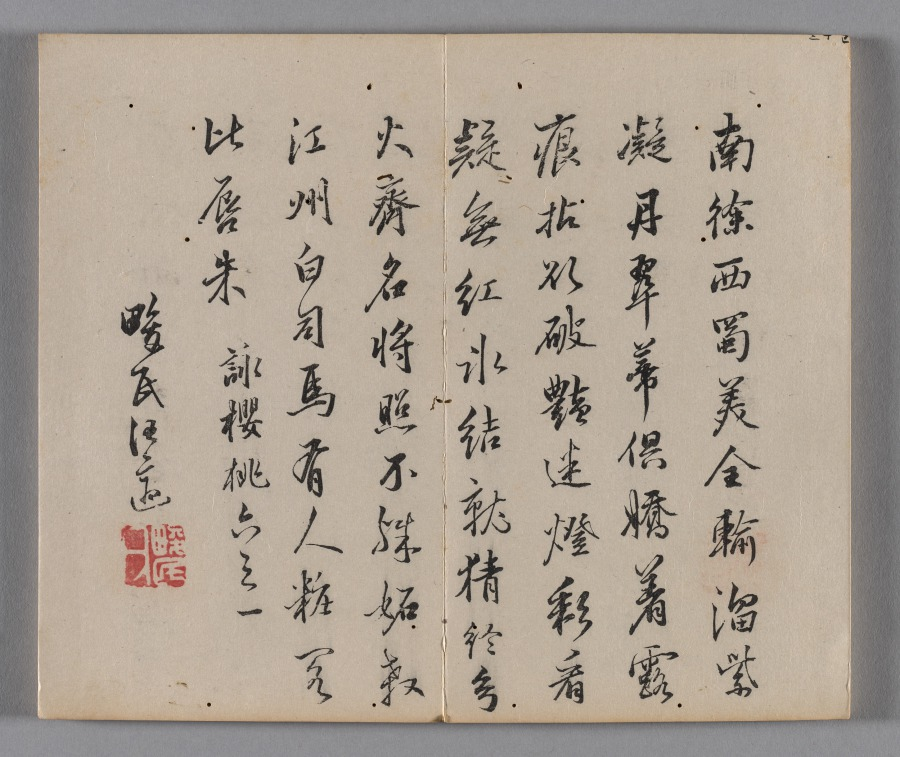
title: Ten Bamboo Studio Painting and Calligraphy Handbook (Shizhuzhai shuhua pu): Fruit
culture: China, Qing dynasty (1644-1911)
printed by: Hu Zhengyan (Chinese, c. 1584–1674)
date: 1633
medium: Woodblock-printed book; ink and colors on paper; first edition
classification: Print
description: Color printing reached a level of perfection in the early 1600s, as seen in this Ten Bamboo Studio Collection of Calligraphy and Painting and the Mustard Seed Garden Manual of Painting (printed 1679 and 1701). The painterly quality, precision in registering (aligning) the woodblocks, and harmonious colors made them the most successful color print editions in Chinese history. Both editions were printed and compiled in Nanjing, spread nationwide, and had a great impact on the arts in Japan and Korea.